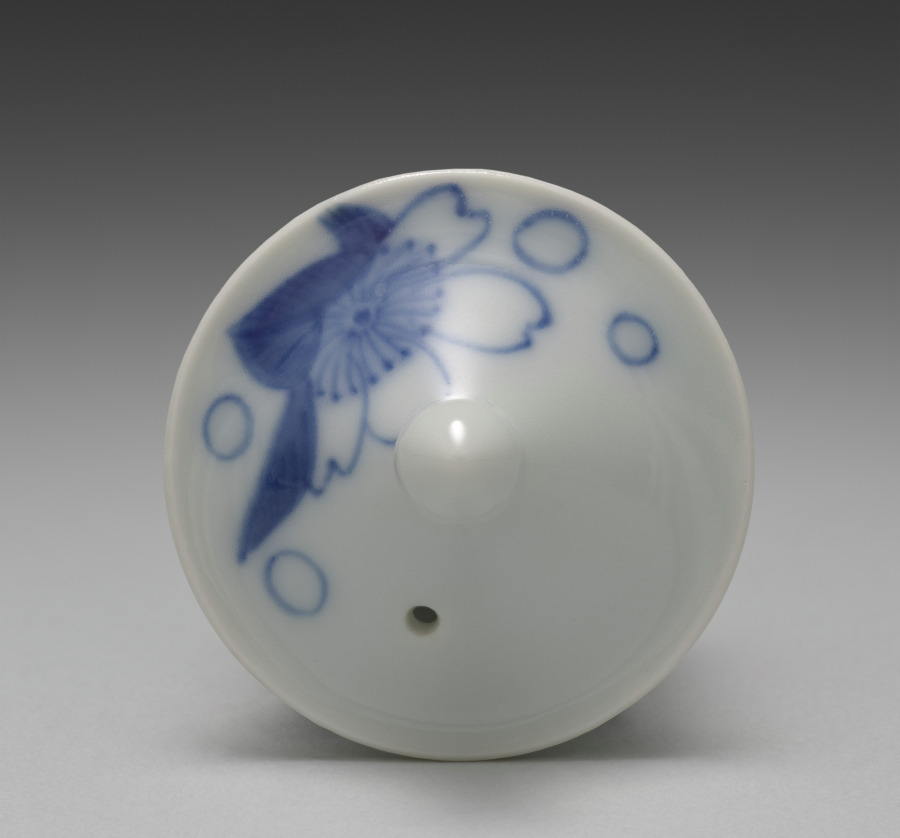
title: Lid for a Teapot with Cherry Blossoms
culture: Japan, Taishō period (1912–26) or Shōwa period (1926–89)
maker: Seifū Yohei IV (Japanese, 1872–1951)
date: 1914–46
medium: Porcelain with underglaze blue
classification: Ceramic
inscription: 清風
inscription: 清風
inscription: 清風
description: This teapot with mountain cherry blossom motifs has its design in underglaze cobalt blue. It runs over both the pear-shaped body and the recessed lid. There is a faint bluish-green tint to the glaze. The mark impressed into the base of this work appears to be one used by Yohei III. However, the box inscription is brushed in a hand matching that of Yohei IV, and while the seal on the lid is one often used by Yohei III, that next to the signature on the back of the lid is one generally used by Yohei IV. The signature, too, resembles others belonging to Yohei IV. As the design, technique, and object named on the box accurately describe the contents, it seems unlikely, but not impossible, that it is mismatched. There are many cases in which Yohei III works are contained in boxes with inscriptions, seals, and a signature by Yohei IV. However, in such examples, Yohei IV clearly identifies himself as authenticating the work of his father and often includes his father’s Imperial Household Artist seal. This may be an example of a transitional piece in which Yohei IV has used his father’s mark on the base of his own work.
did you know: The lid has a pointed, jewel-shaped handle.